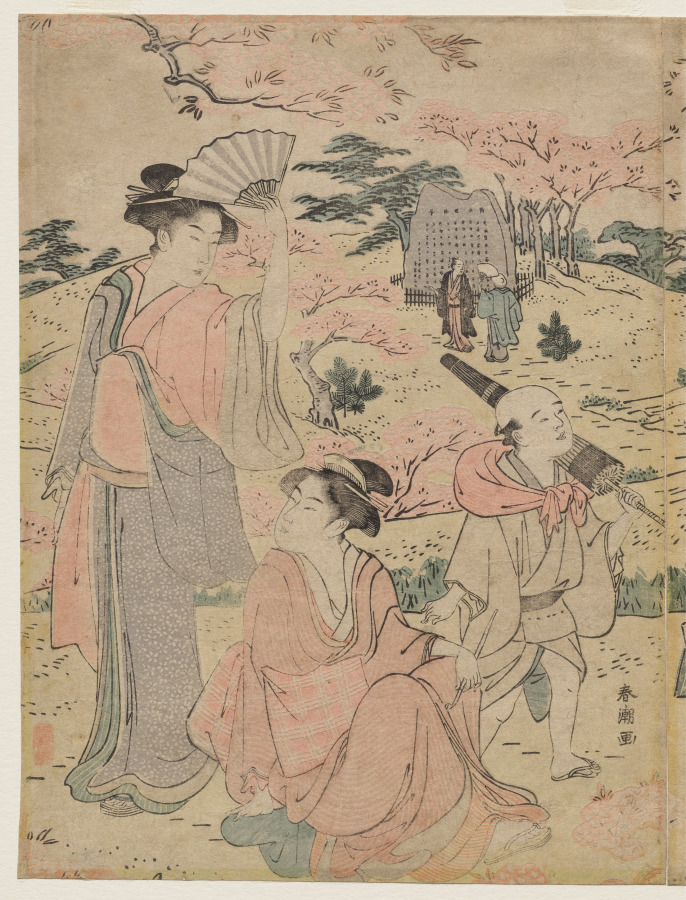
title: Women Viewing Cherry Blossoms at Asukayama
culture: Japan, Edo period (1615–1868)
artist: Katsukawa Shunchō (Japanese)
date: 1780s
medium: color woodblock print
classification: Print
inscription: Signature: Shuncho ga Publisher: Izumiya Ichibei (Senichi han)